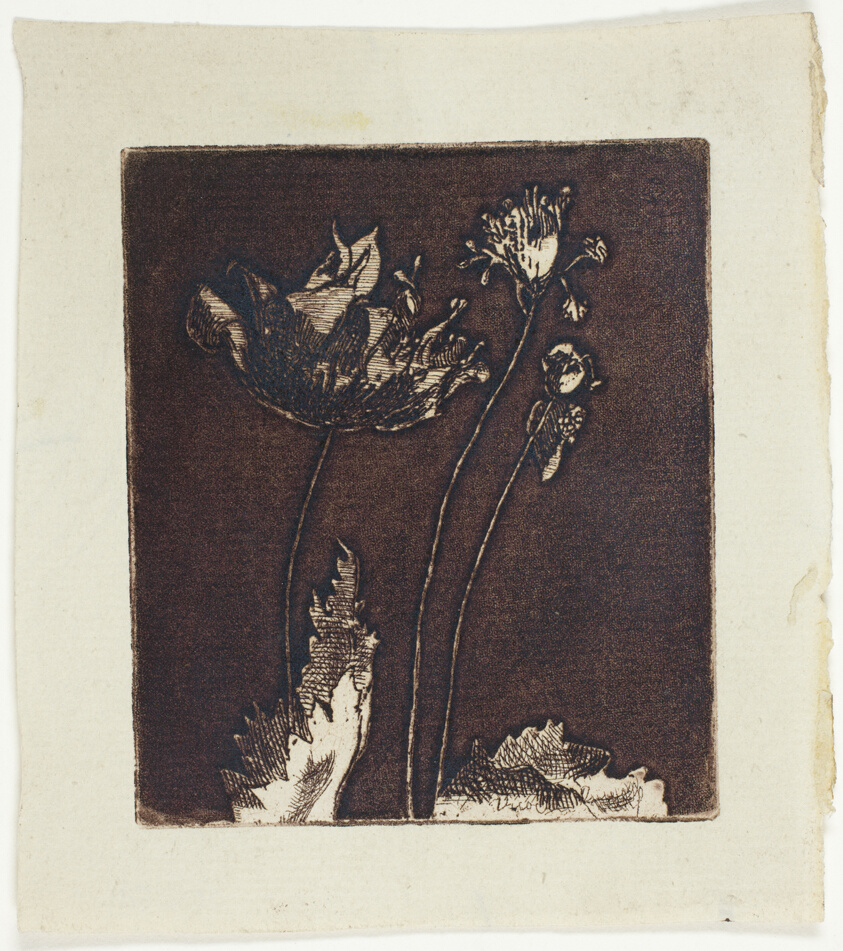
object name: Print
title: Last Poppies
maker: Theodore Roussel (French, worked in England, 1847-1926)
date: 1897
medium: Etching and softground in dark reddish-brown on bluish-ivory laid paper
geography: England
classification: etching; paper; print; prints and drawing